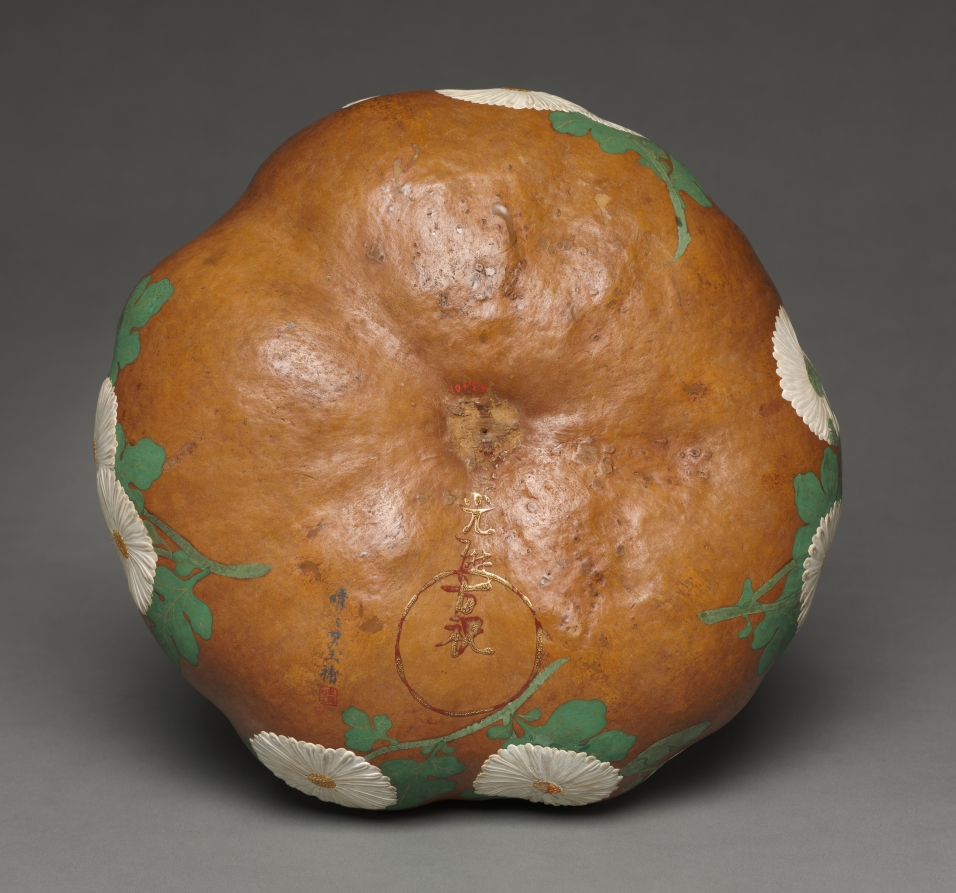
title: Gourd Basket with Chrysanthemum Design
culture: Japan, Edo period (1615–1868)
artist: attributed to Ogata Kōrin (Japanese, 1658–1716)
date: 1700s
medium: gourd; lacquered and painted with gesso, color, and gold pigments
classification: Miscellaneous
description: This very rare basket is made from a carved gourd and inscribed on the bottom with the signature of Ogata Korin (1658– 1716), a painter and lacquerer who founded the Rimpa school. Here, he applied the chrysanthemums with white gesso in relief. This basket is decorated with opaque green paint, and its inside is lined with gold.